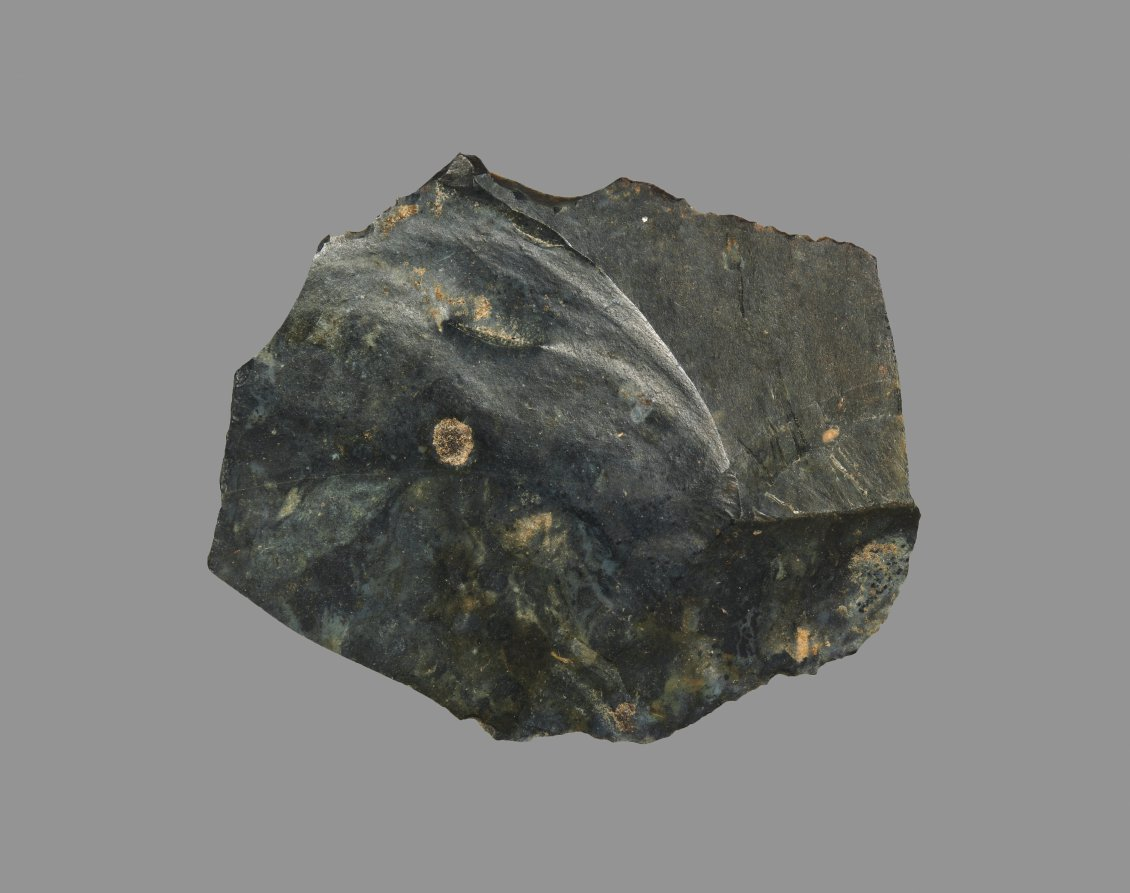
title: Sickle Blade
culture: Egypt, Middle Kingdom (2040–1648 BCE), Dynasty 12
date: 1980–1801 BCE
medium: flint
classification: Implements